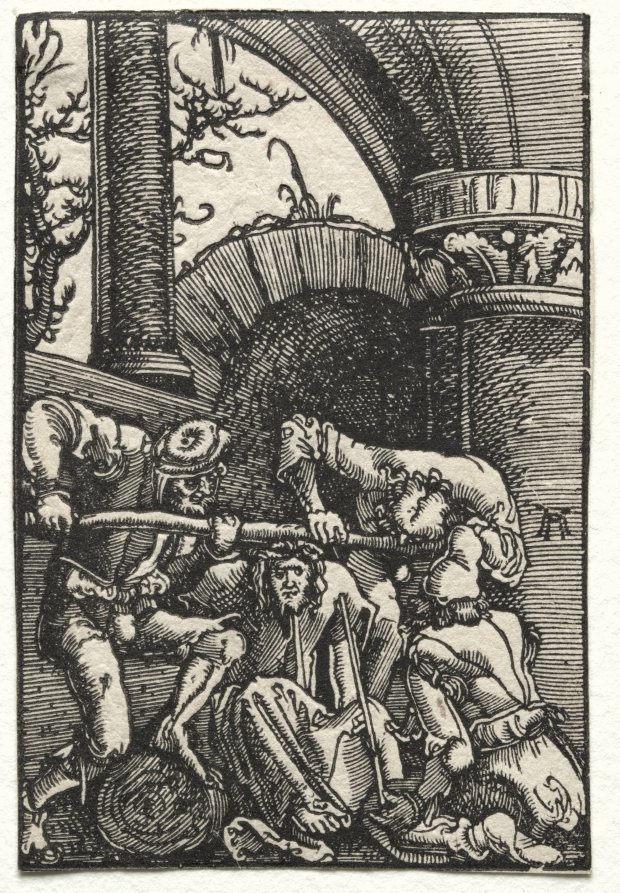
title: The Fall and Redemption of Man: Christ Crowned with Thorns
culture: Germany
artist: Albrecht Altdorfer (German, c. 1480–1538)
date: c. 1515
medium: woodcut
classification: Print